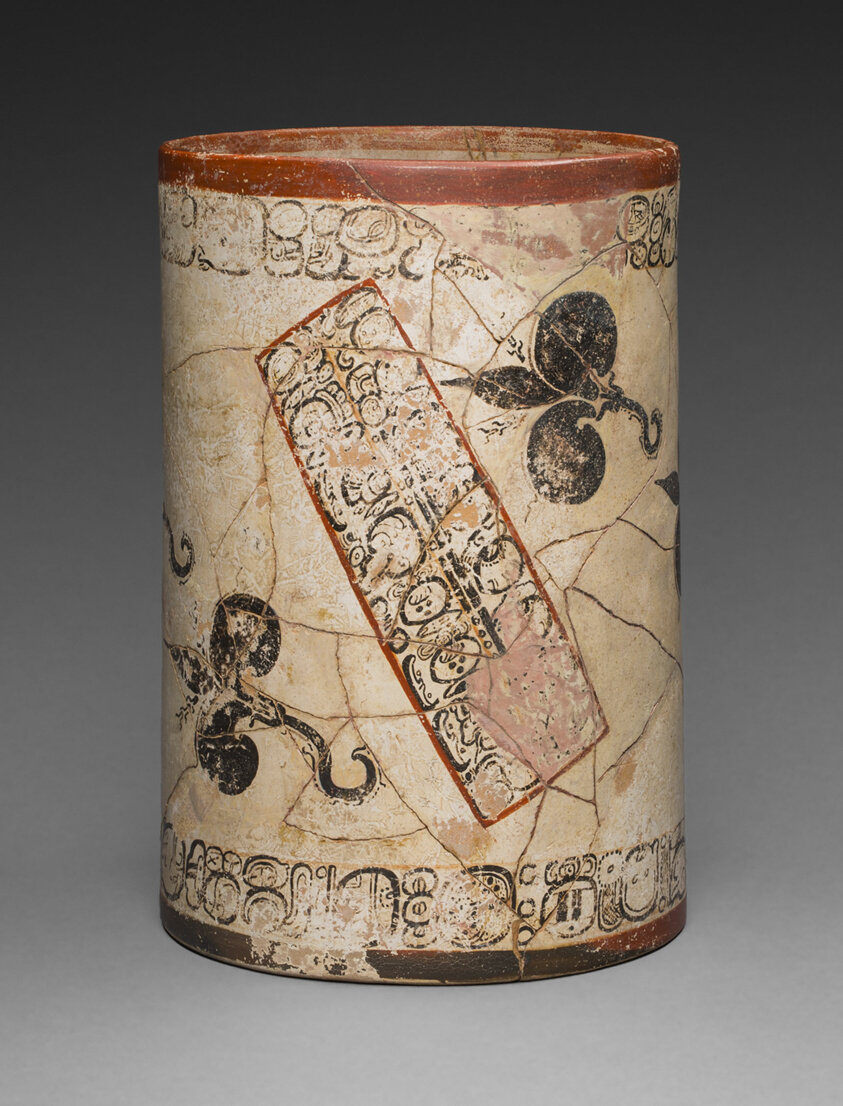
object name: Vessel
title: Water-Lily Vessel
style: maya, classic, mesoamerican, Pre-Columbian, americas, mayan, late classic, Arts of the Americas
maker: Ah Maxam; Maya, active mid-/late 8th century; Vicinity of Naranjo, Petén region, Guatemala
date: 750–800 CE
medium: Ceramic and pigment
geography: Petén department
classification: ceramics; earthenware; vessel; art of the americas; vessel for serving drinks; inscription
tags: waterlilly, artists, flowers, geneology, parents, underworld, underwater